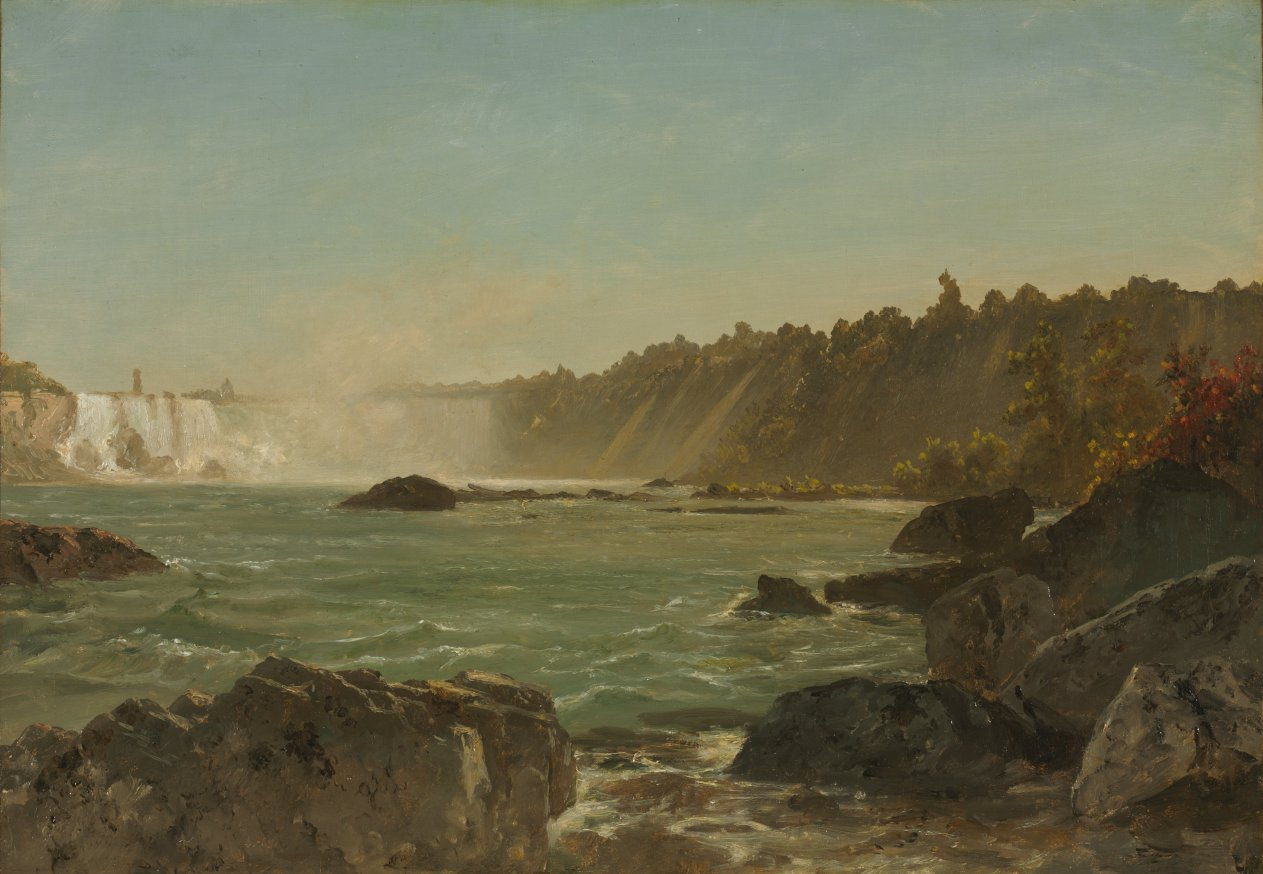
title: View of Niagara Falls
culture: America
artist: John Frederick Kensett (American, 1816–1872)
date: c. 1851–1852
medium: oil on canvas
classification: Painting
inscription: signed lower right: JFK